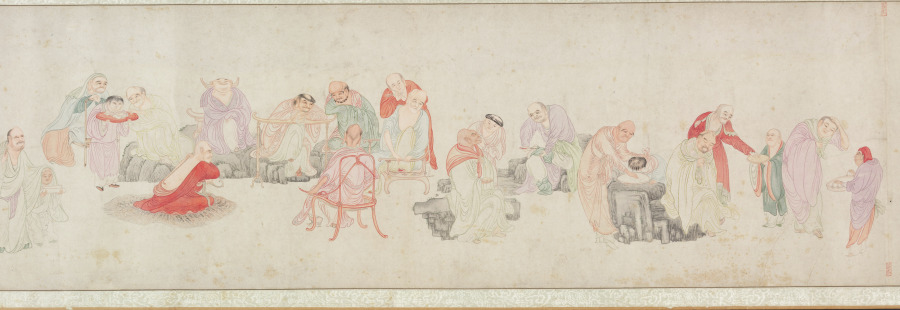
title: The Five Hundred Arhats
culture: China, Ming dynasty (1368–1644)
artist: Wu Bin (Chinese, active c. 1591–1626)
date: 1591–1626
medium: Handscroll; ink and color on paper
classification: Painting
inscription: 枝隱頭陀吳彬齋心拜寫 [印]吳彬之印; 文中父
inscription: 7 seals of Qianlong emperor (r. 1736–95): Gu xi tian zi 古希天子; Shou 壽; Qianlong jian shang 乾隆鑑賞; San xi tang jing jian xi 三希堂精鑑璽; Yi zi sun 宜子孫; Tai shang huang di zhi bao 太上皇帝之寳; Qian qing gong bao 乾清宮寶.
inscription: 6 seals of Cheng Qi 程琦 (1911–1988): Ke an geng zi wu shi yi hou suo de ming ji 可菴庚子五十以後所得名跡; 5 other Cheng Qi seals.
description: More than 66 feet long, this handscroll depicts 447 luohans, 72 attendants, and the bodhisattva of compassion at its very end. Luohans (arhats in Sanskrit), disciples of the Buddha and protectors of the Buddha’s law, possess supernatural powers and take on myriad external appearances. The amusing assortment of characters are engaged in an array of religious, secular, and miraculous activities. The painter used stylistic features borrowed from earlier artists, carefully controlled lines, and refined coloring. Wu Bin was a lay Buddhist and depicting this sort of image was part of a religious practice seeking understanding of the Buddha’s teaching.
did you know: Far advanced on the path to enlightenment, arhats have the capacity to tame tigers, free dragons, and to float on water or in the air.